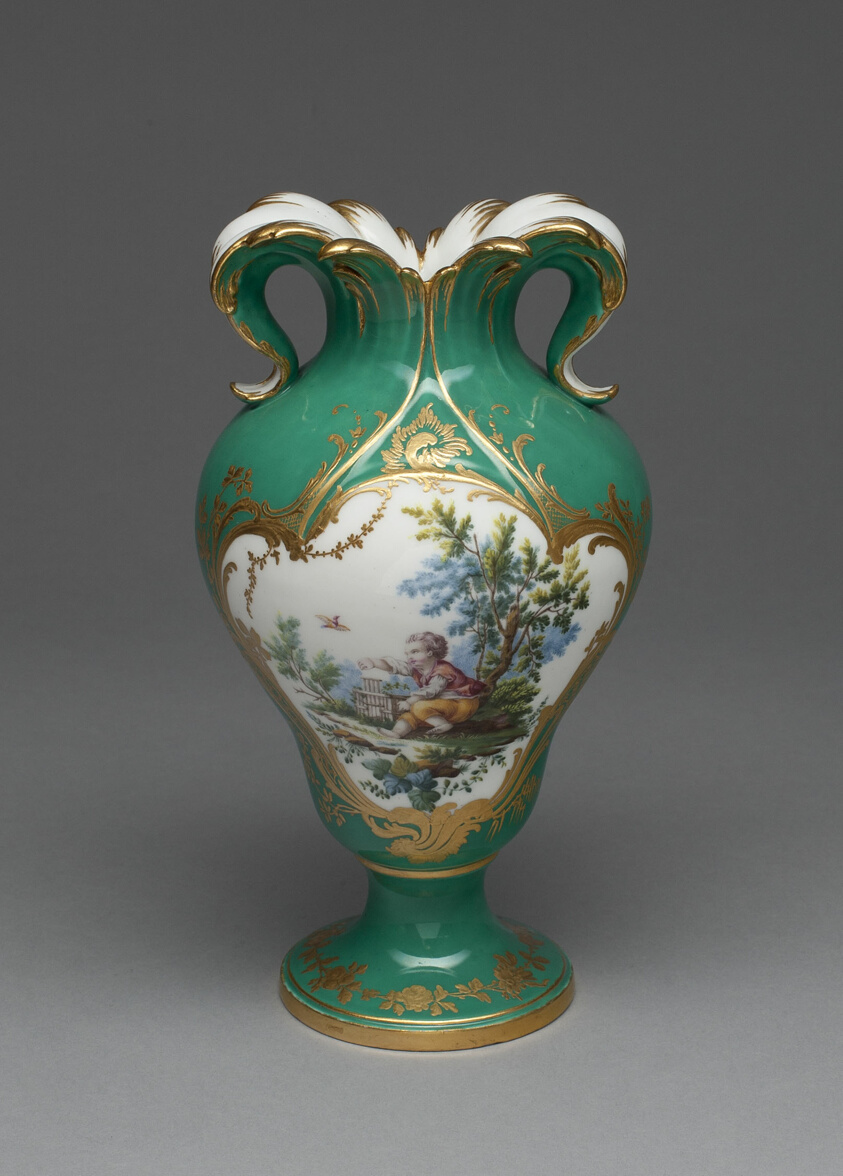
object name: Ceramics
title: Vase (Vase à oreilles)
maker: Sèvres Porcelain Manufactory (French, founded 1740); Probably designed by Jean-Claude Duplessis (French, c. 1695-1774); Painting attributed to by André-Vincent Vielliard (French, 1717-1790, active 1752-1790)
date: c. 1756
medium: Soft-paste porcelain, green ground, polychrome enamels, and gilding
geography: Sèvres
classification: vase; vessel; porcelain; ceramics; european decorative arts